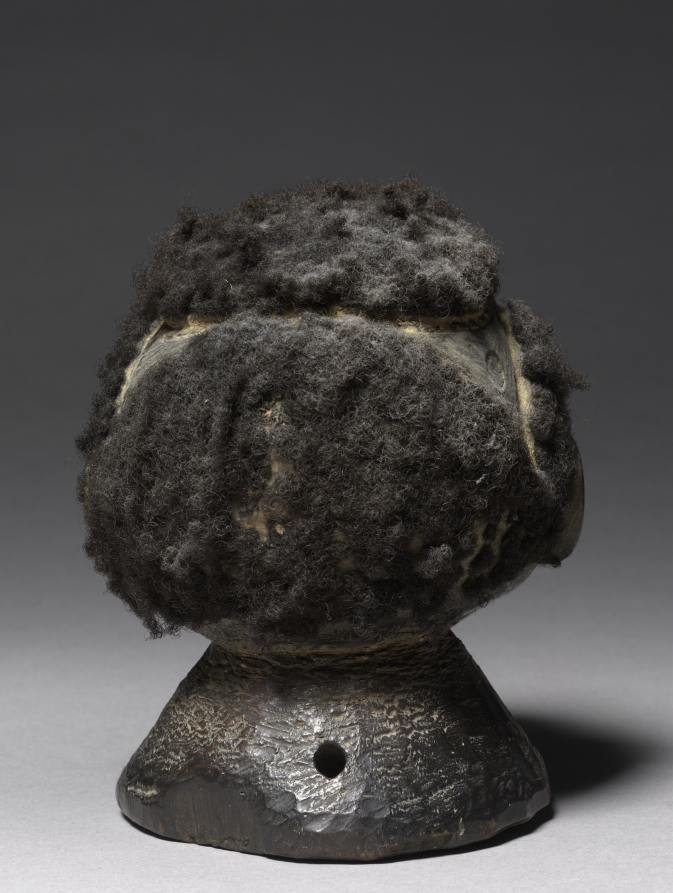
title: Headdress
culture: Africa, West Africa, Nigeria, Idoma-style carver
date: early 1900s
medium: Wood, human hair, paint, and possibly kaolin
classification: Mask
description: This was used in masked performances of the Agrinya society, a powerful guild formerly restricted to men who had killed an elephant, lion, or man. The white pigment connotes the realm of the ancestors, while the aggressive expression of the face seems to suggest the courage of Agrinya society members.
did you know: Holes in the neck once attached a flat raffia disk or strings for wearing the headdress-type mask on top of the head.